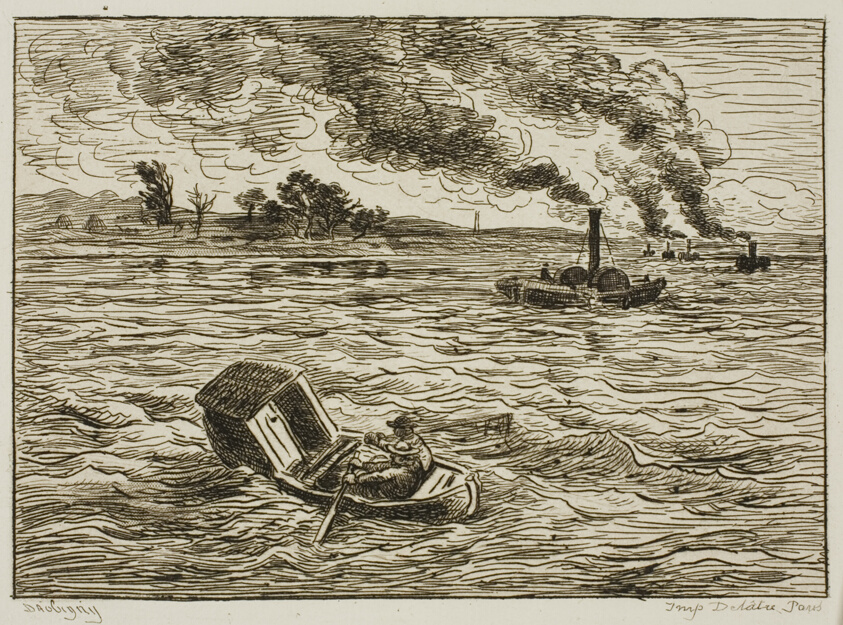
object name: Print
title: The Steamboats (Steamy Harbor)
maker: Charles François Daubigny (French, 1817-1878)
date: 1861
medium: Etching on ivory laid paper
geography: France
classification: etching; print; prints and drawing